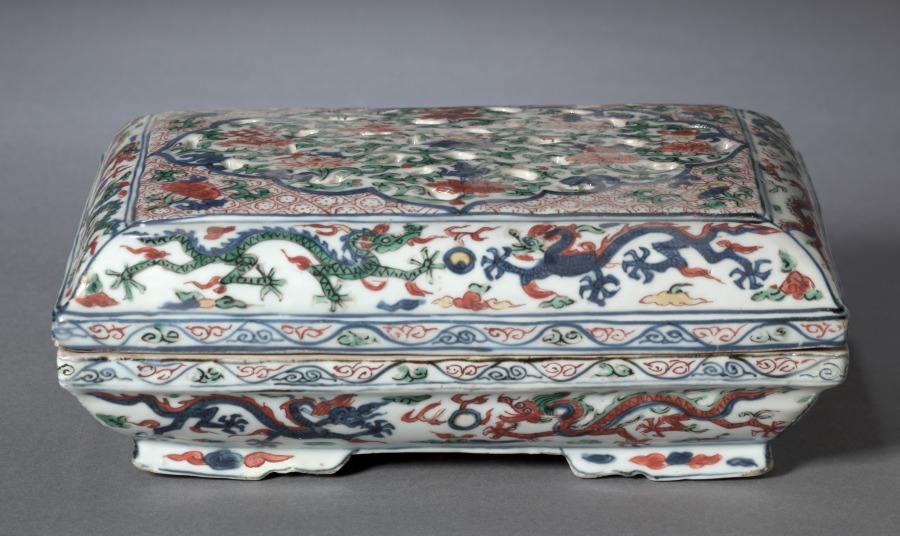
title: Box with Cover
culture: China, Jiangxi province, Jingdezhen kilns, Ming dynasty (1368-1644), Wanli reign (1572-1620)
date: 1573–1620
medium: porcelain with wucai (five color) overglaze enamel decoration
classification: Ceramic